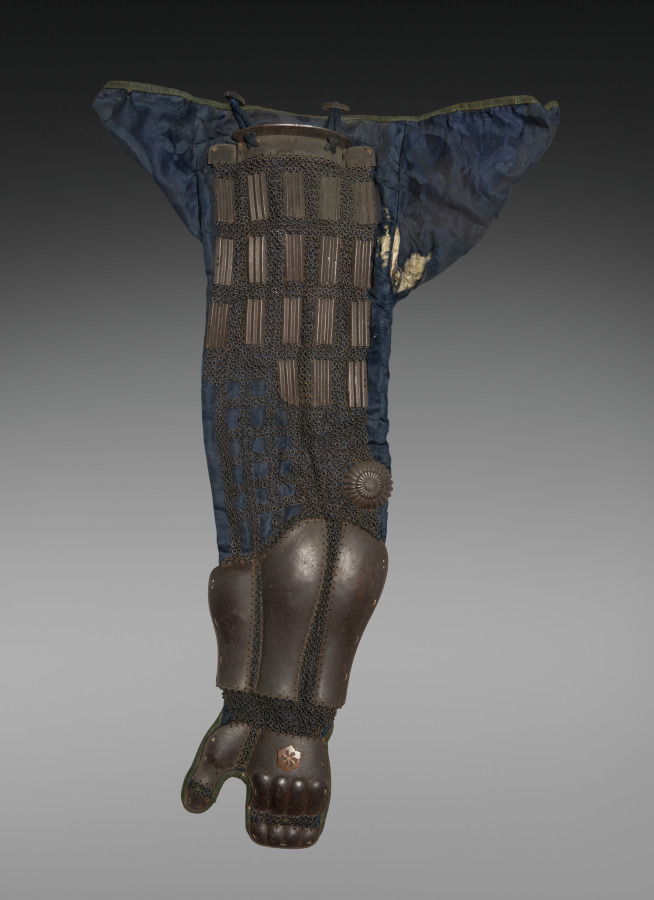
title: Armored Sleeve (Kote)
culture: Japan, Edo period (1615–1868)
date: 1600s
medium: Iron, lacquer, textile (silk)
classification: Arms and Armor